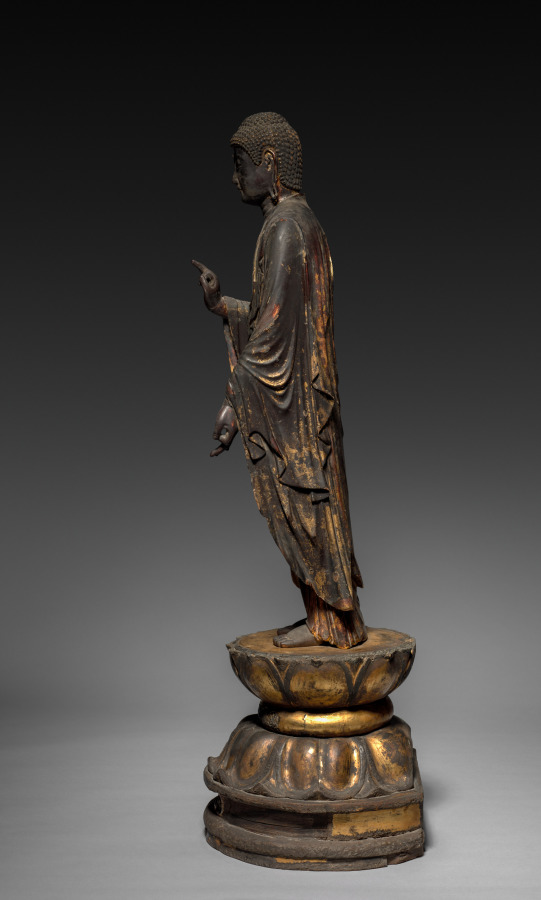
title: Amida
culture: Japan, Kamakura period (1185–1333)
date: 1200s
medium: Wood with lacquer and gilding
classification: Sculpture